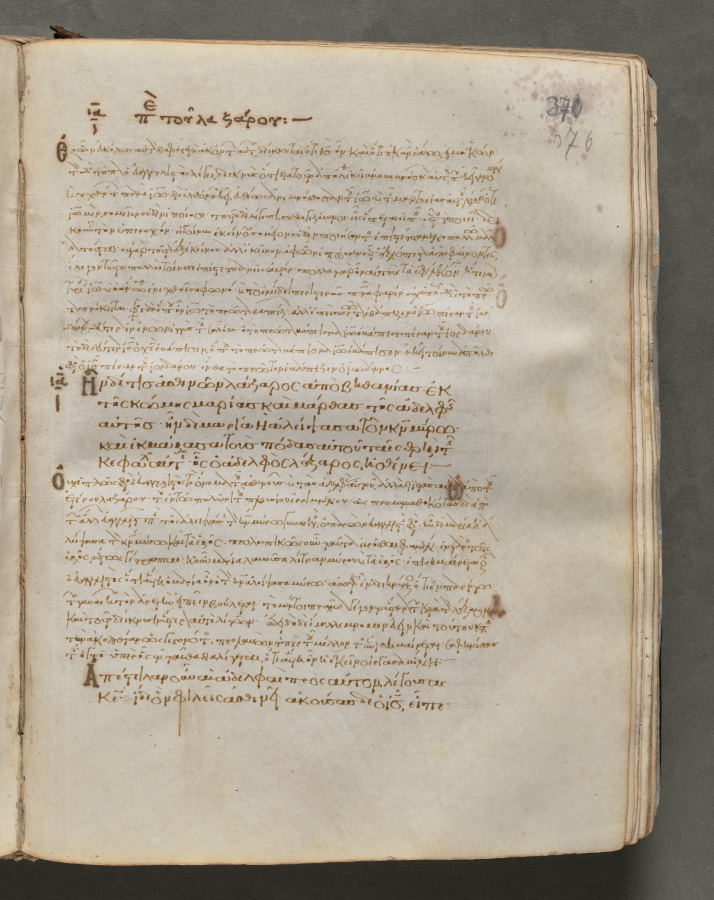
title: Text, folio 376 (recto), from a Gospel Book with Commentaries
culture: Byzantium, Constantinople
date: c. 1000–1100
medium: ink, tempera, and gold on vellum; leather binding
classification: Bound Volume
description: Each of the four gospels in this book opens on a page with brilliantly illuminated borders depicting the author of the text as well as birds—principally peacocks, symbols of the immortality of the soul—and fountains, representing the fountain of life and the salvation of the soul. This volume consists of 428 leaves with texts in Greek. Its level of sophistication suggests that it was probably written and decorated in a monastery in Constantinople.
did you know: Gospel books were carried in procession through Byzantine churches.